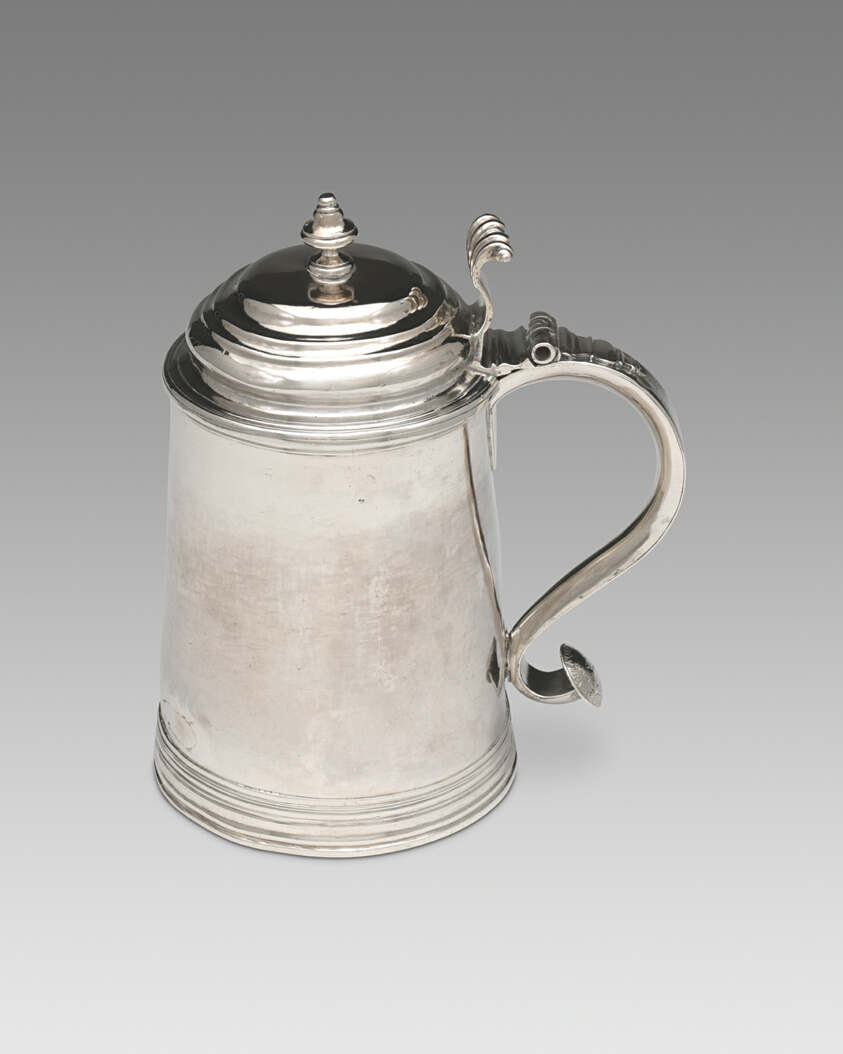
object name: Metalwork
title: Tankard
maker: Attributed to William Hookey, Sr.; American, c. 1728–1812; Newport, Rhode Island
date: 1740–74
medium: Silver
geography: Newport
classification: drinking vessel; silver; american decorative arts; american arts; decorative arts